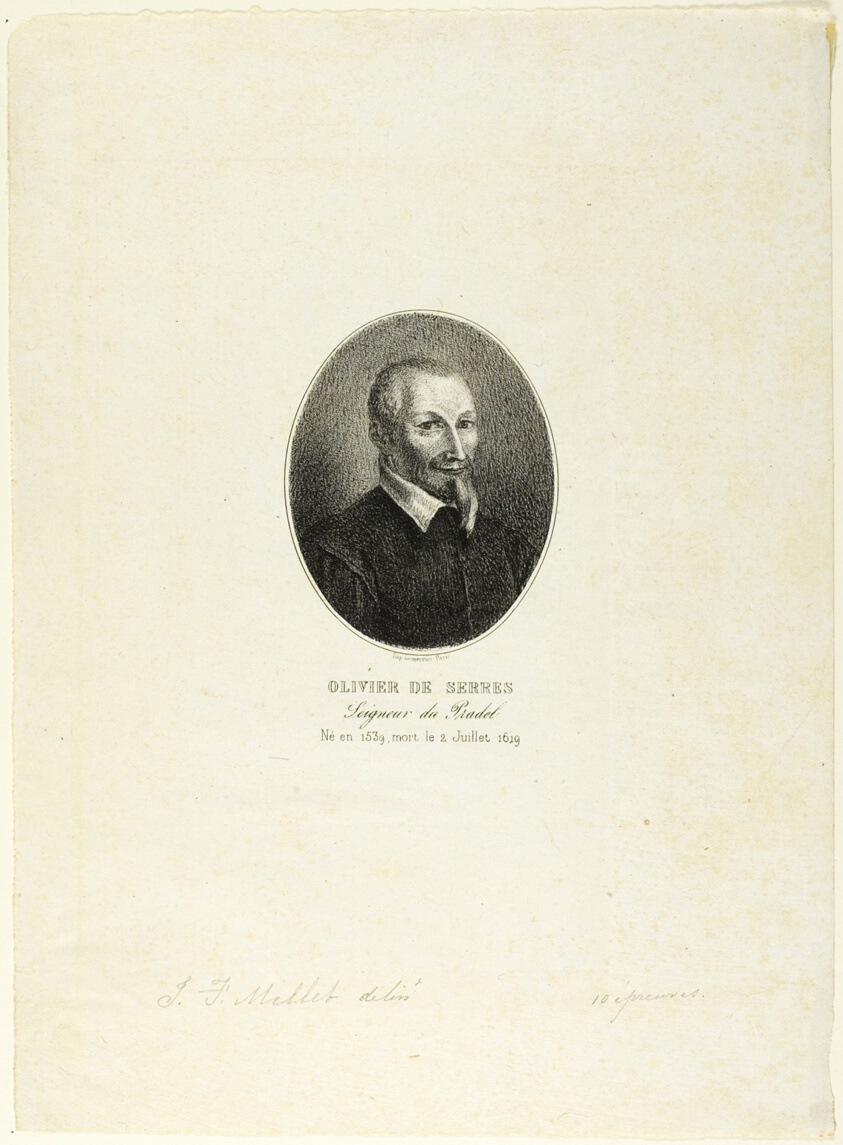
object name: Print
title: Olivier de Serres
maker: Jean François Millet (French, 1814-1875); after Daniel de Serres (French, 1539-1619); printed by Lemercier et Compagnie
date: 1858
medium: Lithograph on ivory wove China paper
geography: France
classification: lithograph; print; prints and drawing